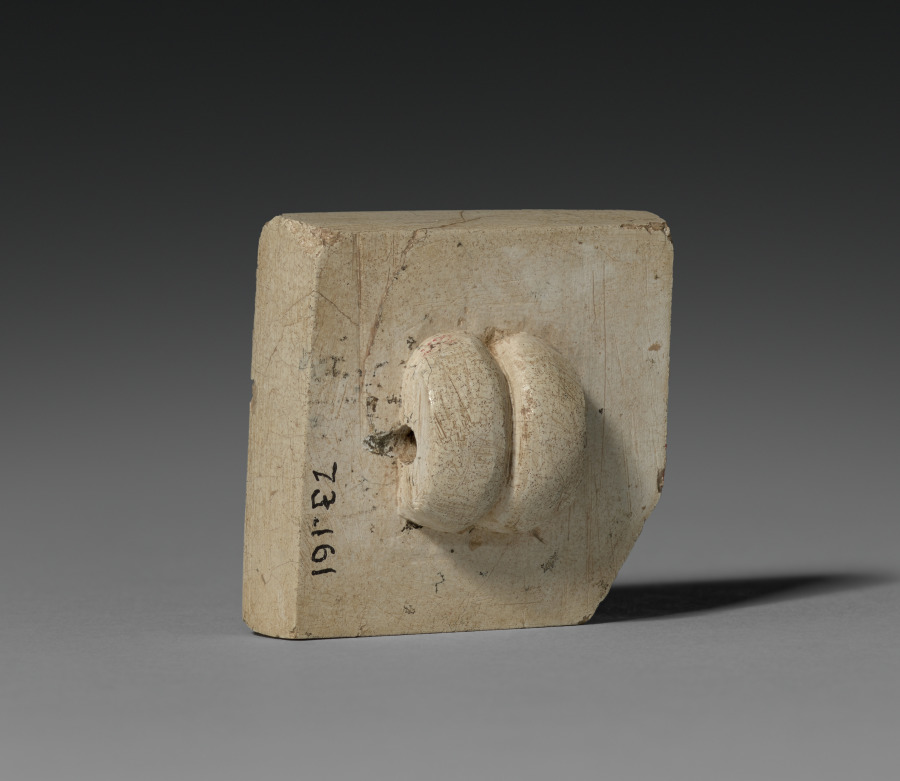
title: Seal with Unicorn and Inscription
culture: Pakistan, Indus Valley civilization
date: c. 2000 BCE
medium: steatite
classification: Seals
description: Indus Valley seals appear to have been hung on a string that passed through a boss on the reverse side. This animal, carved with detailed markings around his neck and forequarters, has his head positioned over an object on a stand that may be interpreted as an altar or brazier or censer; it is not known whether it is for offerings to or sacrifice of the animal.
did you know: Specialists disagree as to whether single-horned bovines actually lived during the time of the Indus Valley Civilization, four thousand years ago.